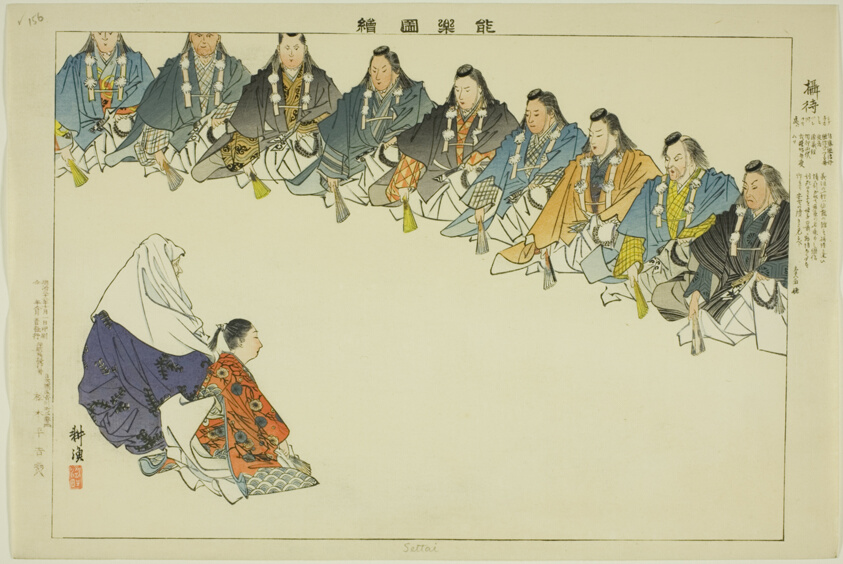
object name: Print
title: Settai, from the series "Pictures of No Performances (Nogaku Zue)"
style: Japanese (culture or style)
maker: Tsukioka Kogyo; Japanese, 1869-1927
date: 1898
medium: Color woodblock print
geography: Japan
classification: woodblock print; print; asian art